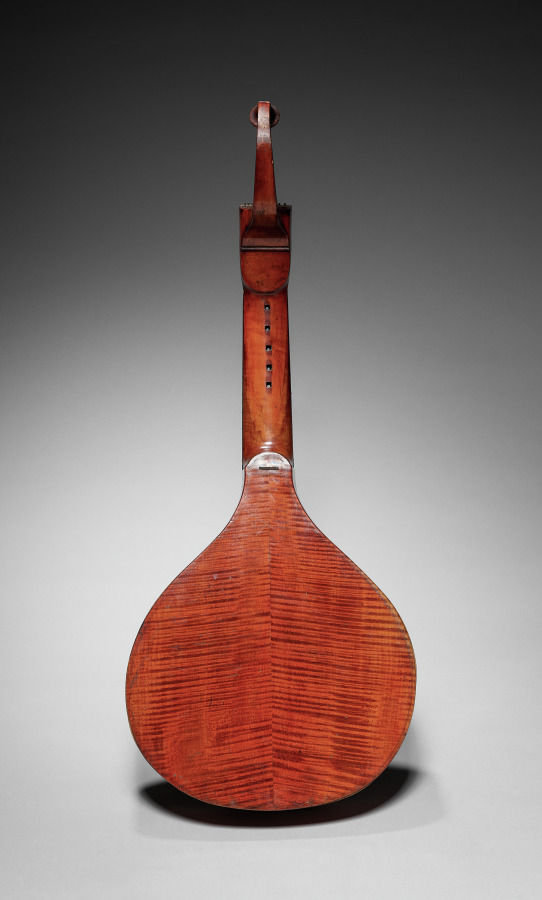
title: Guitar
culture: England, London, late 18th century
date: late 1700s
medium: varnished wood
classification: Musical Instrument